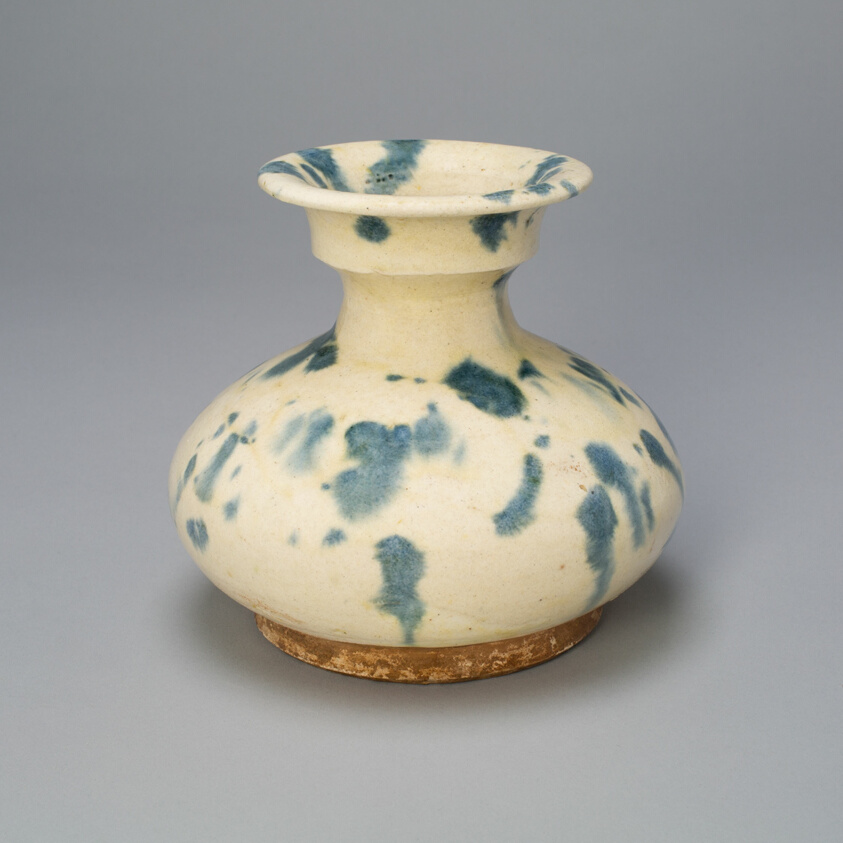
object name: Vessel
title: Broad Pear-Shaped Jar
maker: China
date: Tang dynasty (618–907), 8th century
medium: Glazed stoneware with cobalt-blue splashes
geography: China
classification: vessel